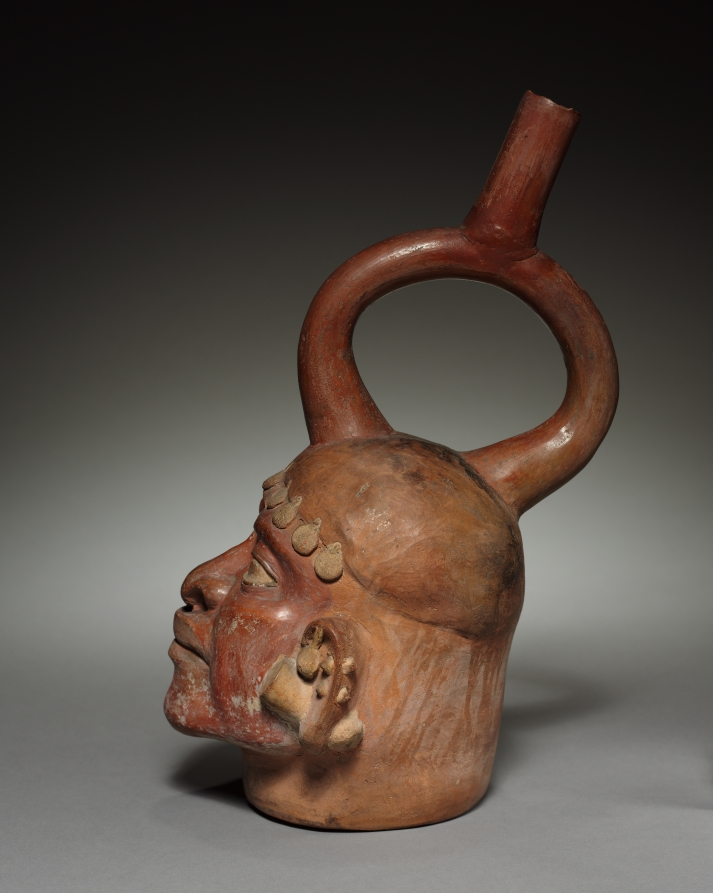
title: Bottle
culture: Peru, Mochica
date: before 1930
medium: pottery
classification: Ceramic